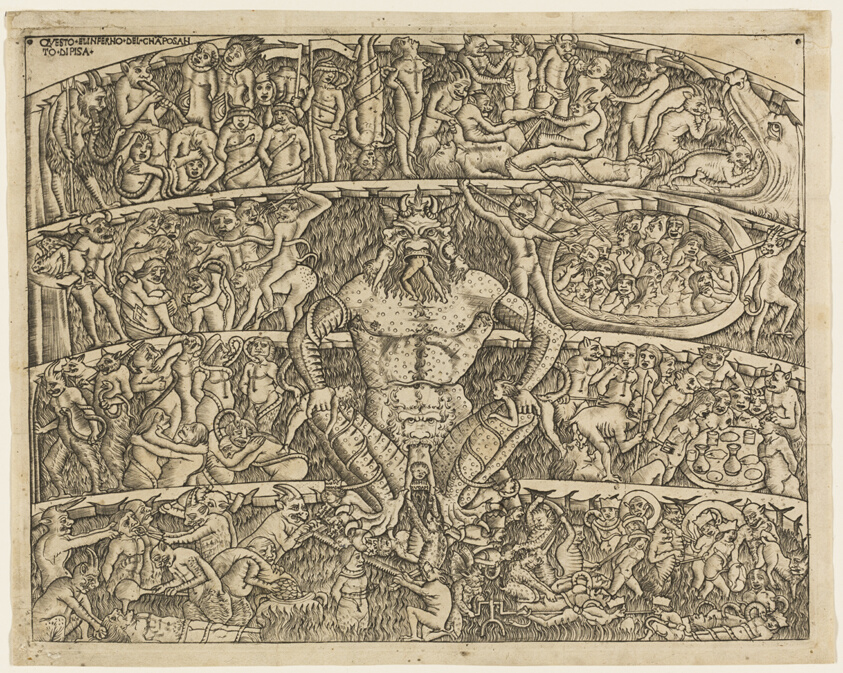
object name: Print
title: The Inferno According to Dante, from the Campo Santo Frescos in Pisa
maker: Unknown Artist; Italian, 15th century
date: 1480/1500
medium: Engraving in black on paper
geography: Italy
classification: engraving; print; prints and drawing